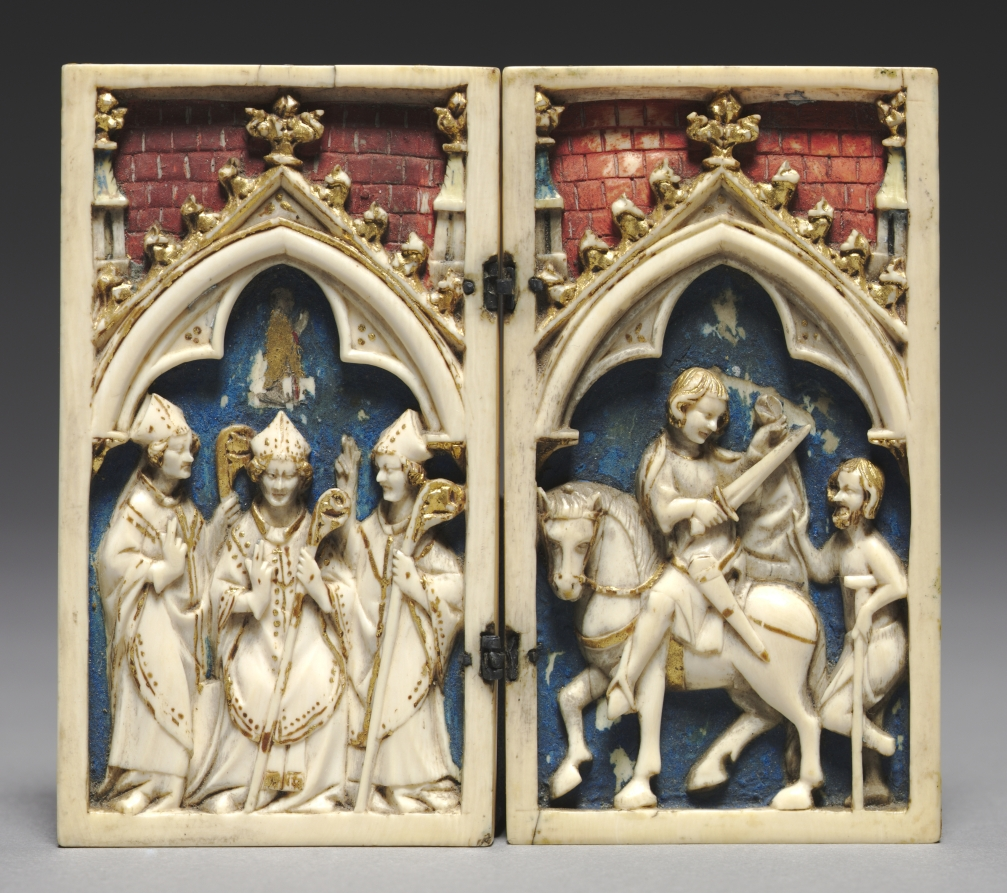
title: Diptych with Scenes from the Life of Saint Martin of Tours: The Consecration of Saint Martin as Bishop (left); Saint Martin Shares his Cloak with a Beggar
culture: Germany, Cologne, 14th century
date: 1340–1350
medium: ivory with polychromy and gilding, original silver hinges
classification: Ivory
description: This beautiful and well-preserved diptych includes its original polychromy, gilding, and silver hinges, though these are no longer connected. With its lapis background, red roof tiles, and gilded details of the figures’ clothing, the appearance is one of luxuriousness. The diptych provides us with a rare and vivid impression of how such devotional ivories were originally decorated in the 1300s.